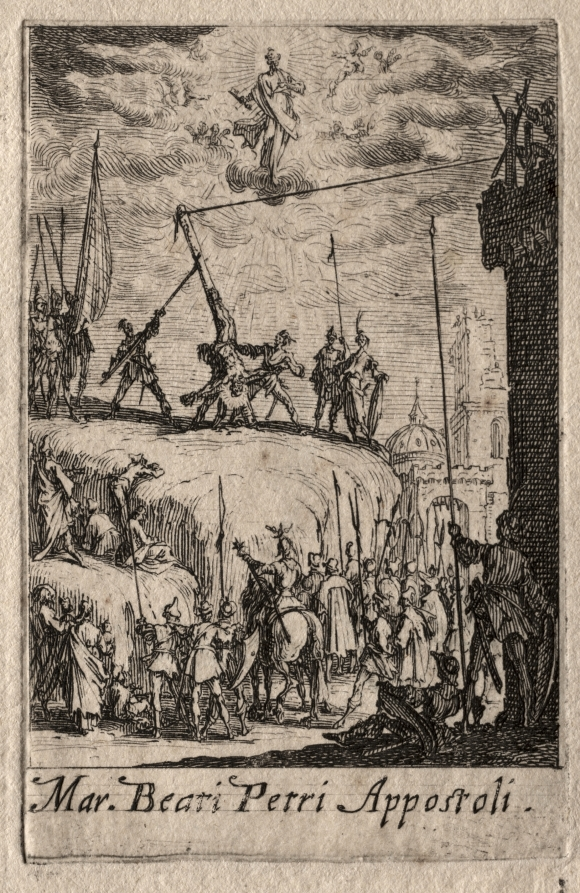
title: The Martyrdom of the Apostles: St. Peter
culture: France, 17th century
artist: Jacques Callot (French, 1592–1635)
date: ca. 1632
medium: etching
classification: Print